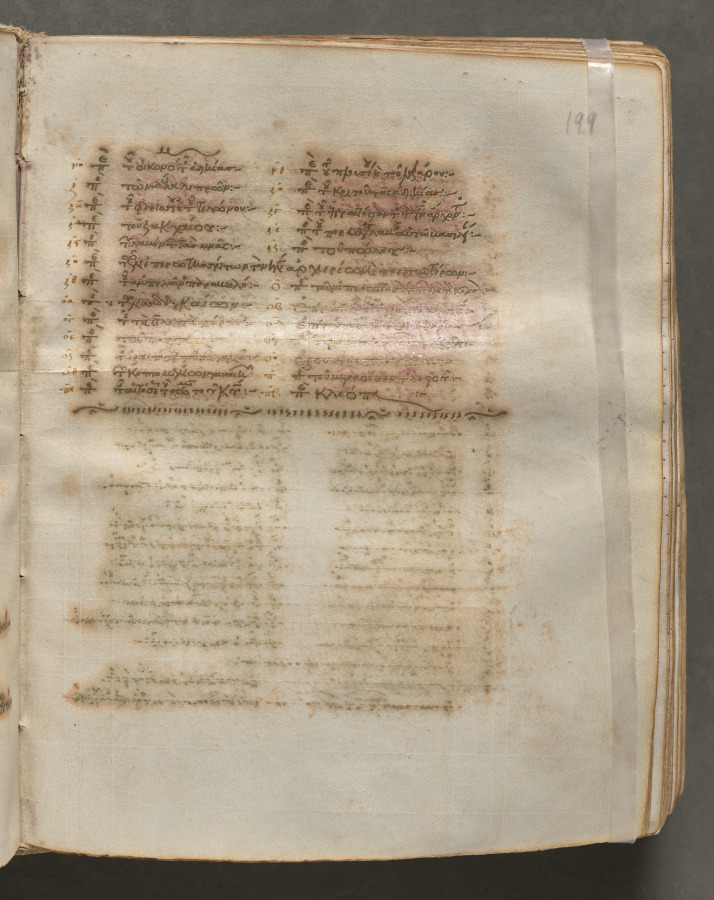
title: Text, folio 199 (recto), from a Gospel Book with Commentaries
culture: Byzantium, Constantinople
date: c. 1000–1100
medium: ink, tempera, and gold on vellum; leather binding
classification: Bound Volume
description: Each of the four gospels in this book opens on a page with brilliantly illuminated borders depicting the author of the text as well as birds-principally peacocks, symbols of the immortality of the soul-and fountains, representing the fountain of life and the salvation of the soul. This volume consists of 428 leaves with texts in Greek. Its level of sophistication suggests that it was probably written and decorated in a monastery in Constantinople.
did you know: Gospel Books were carried in procession through Byzantine churches.